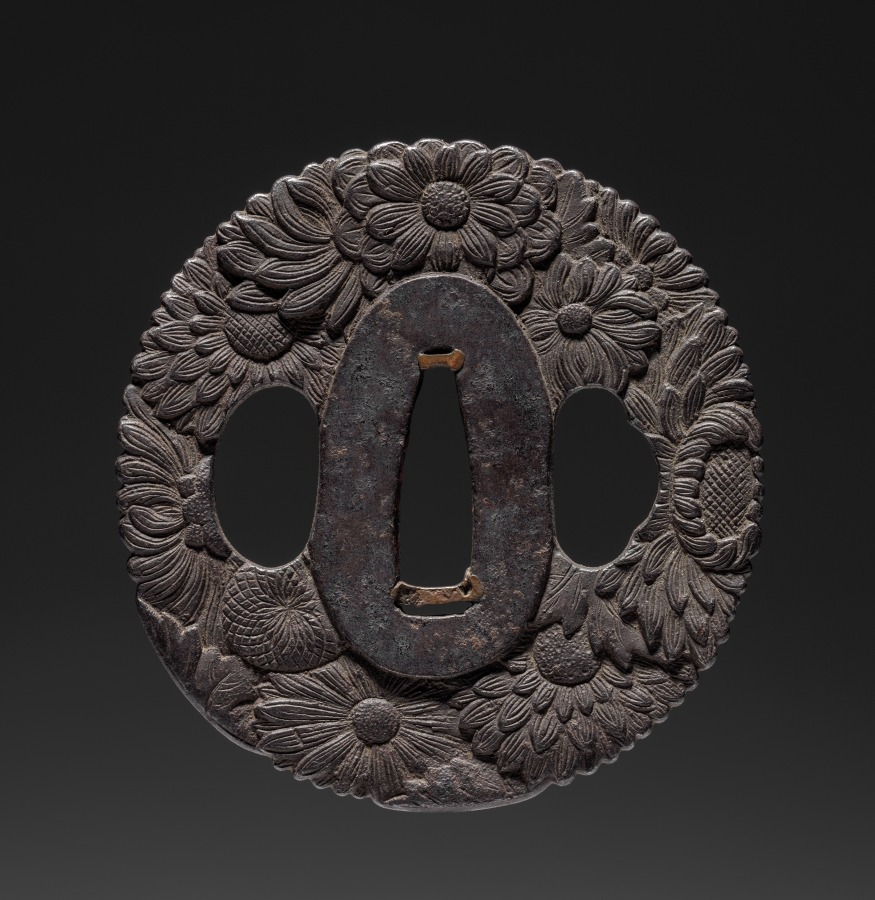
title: Sword Guard (Tsuba) with Chrysanthemums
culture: Japan, possibly Edo period (1615-1868)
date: c. 1615–1868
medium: iron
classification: Arms and Armor